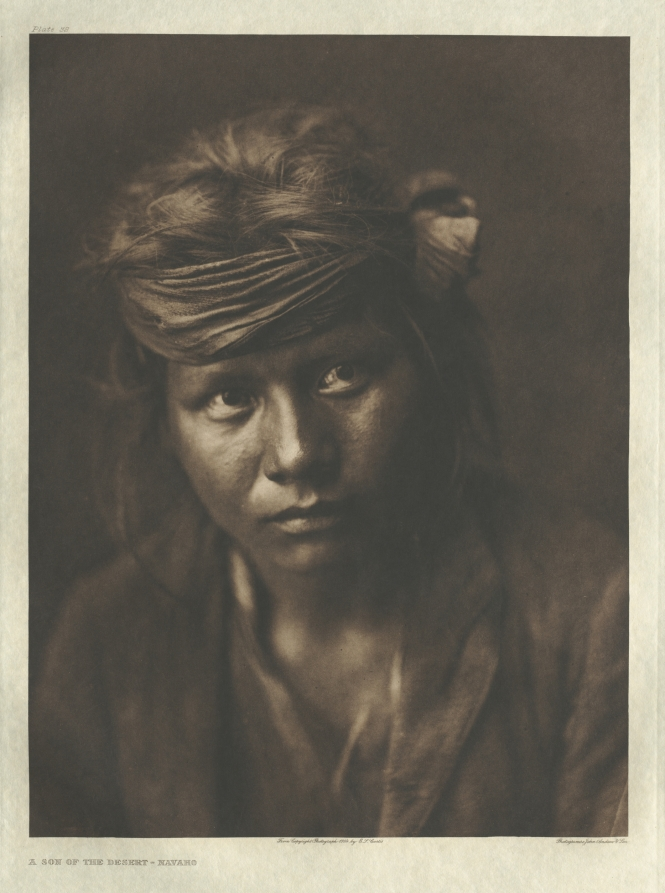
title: Portfolio I, Plate 32: A Son of the Desert - Navaho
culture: America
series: The North American Indian: being a series of Portfolios picturing and describing the Indians of the United States, the Dominion of Canada, and Alaska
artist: Edward S. Curtis (American, 1868–1952)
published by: The University Press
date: 1904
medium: photogravure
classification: Portfolio